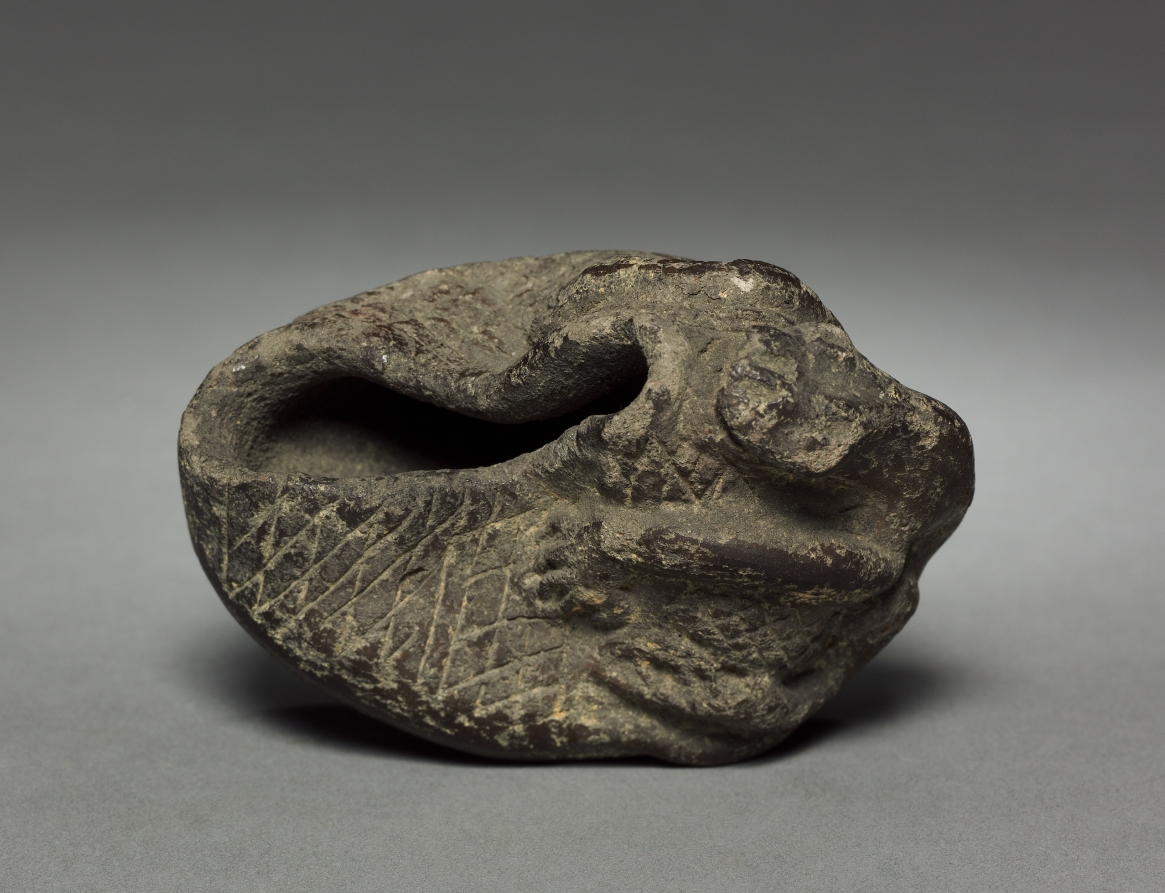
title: Dish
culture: Colombia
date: before 1921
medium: pottery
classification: Ceramic